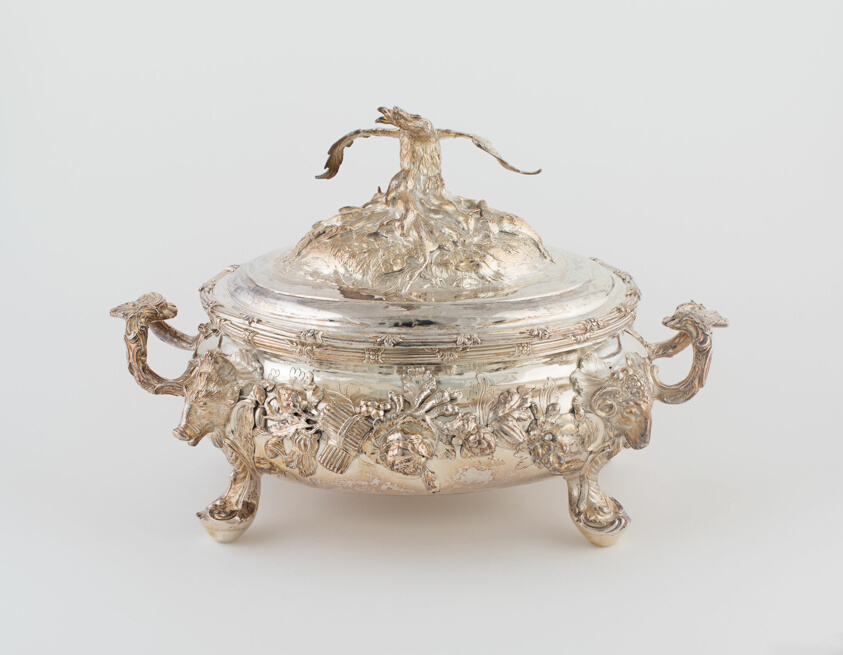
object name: Metalwork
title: Tureen with Cover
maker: Peter Archambo I; English, 1680-1768; London, England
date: 1745/46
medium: Silver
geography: London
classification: silver; metalwork; european decorative arts